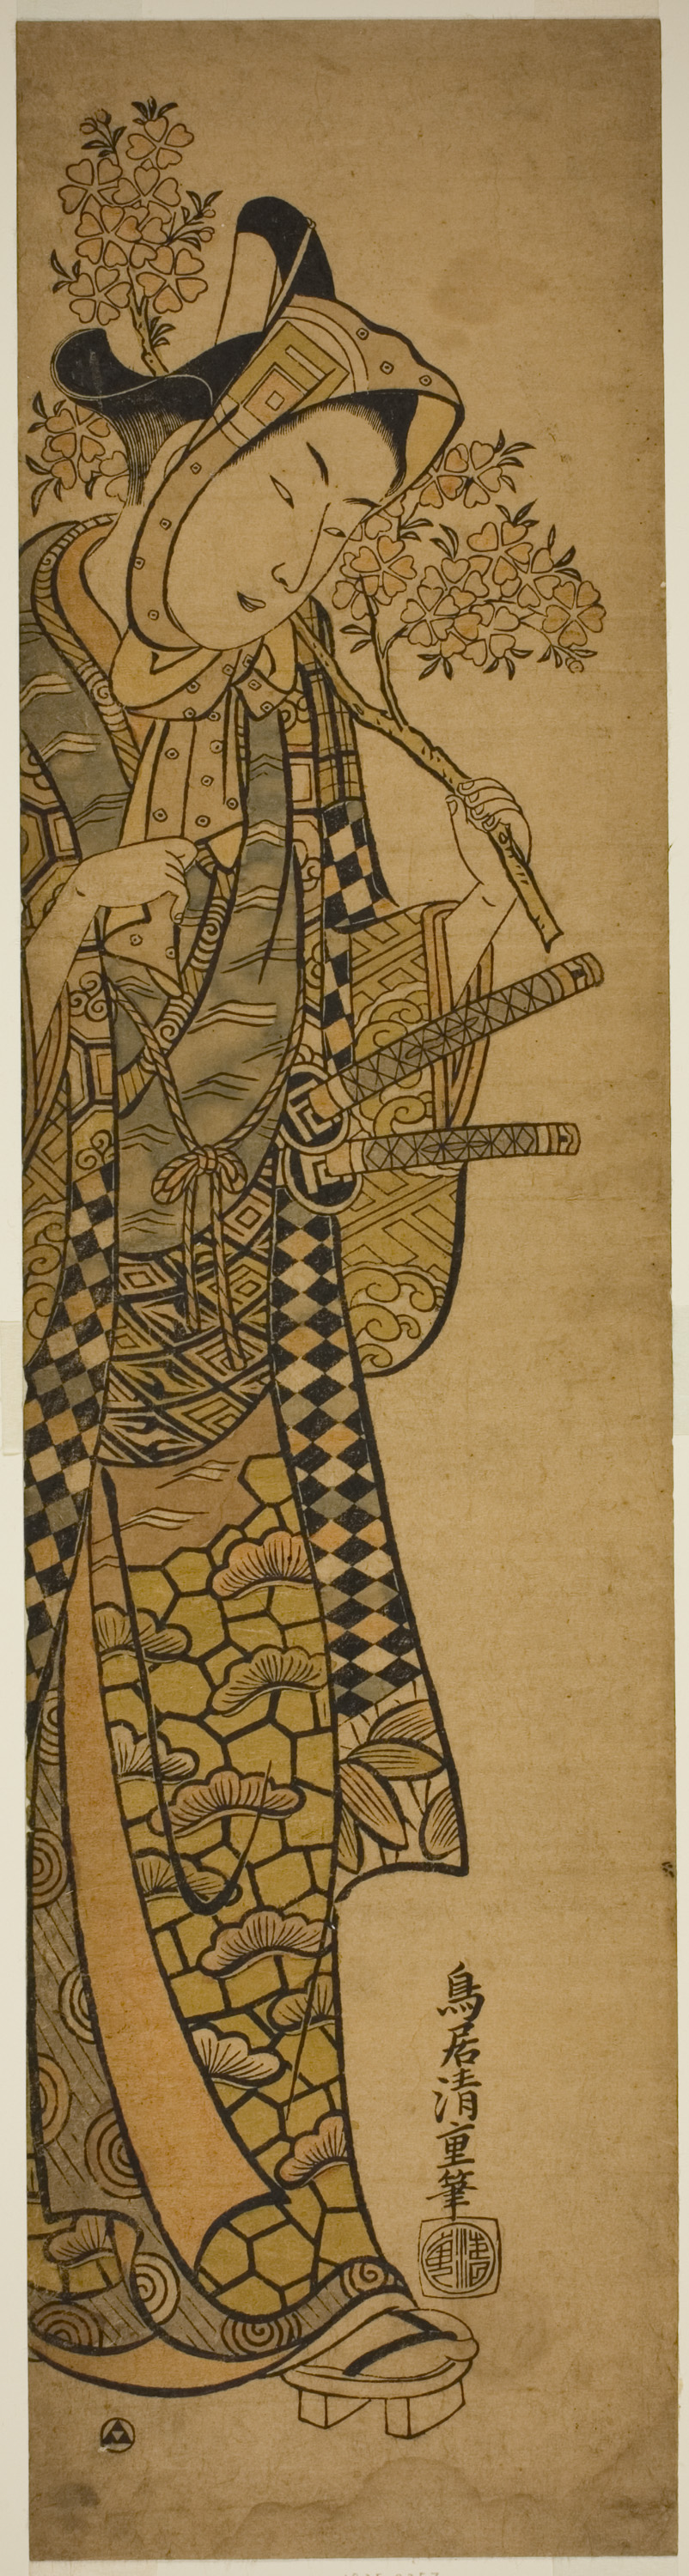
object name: Print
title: The Actor Sanogawa Ichimatsu l as a young man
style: Japanese (culture or style)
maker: Torii Kiyoshige (Japanese, active c. 1728-63)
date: c. 1742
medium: Hand-colored woodblock print; habahiro hashira-e, beni-e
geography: Japan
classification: woodblock print; print; asian art